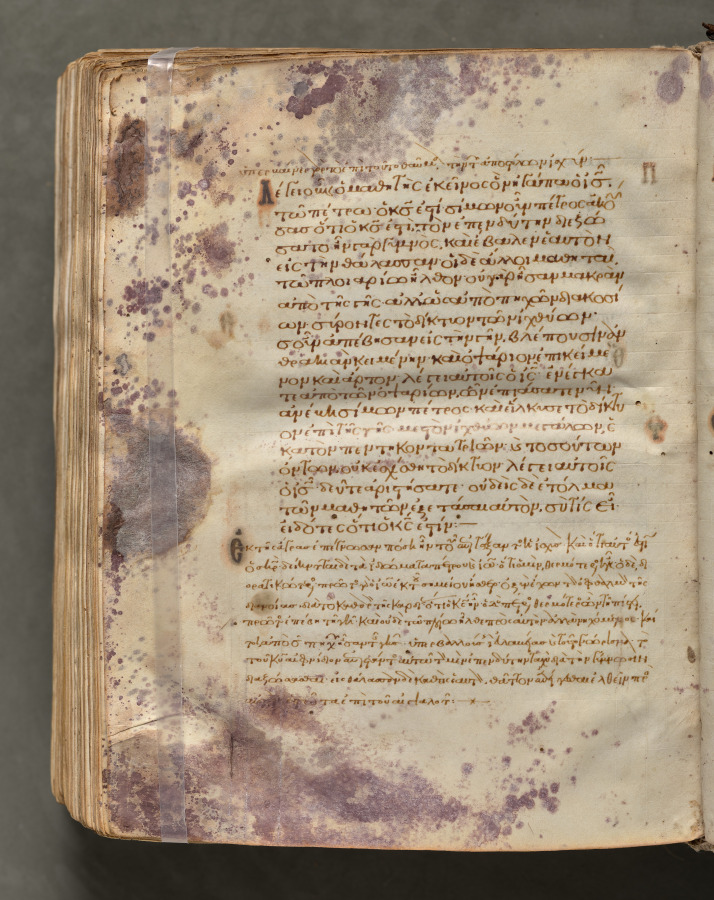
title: Text, folio 422 (verso), from a Gospel Book with Commentaries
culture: Byzantium, Constantinople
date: c. 1000–1100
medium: ink, tempera, and gold on vellum; leather binding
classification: Bound Volume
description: Each of the four gospels in this book opens on a page with brilliantly illuminated borders depicting the author of the text as well as birds—principally peacocks, symbols of the immortality of the soul—and fountains, representing the fountain of life and the salvation of the soul. This volume consists of 428 leaves with texts in Greek. Its level of sophistication suggests that it was probably written and decorated in a monastery in Constantinople.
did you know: Gospel books were carried in procession through Byzantine churches.